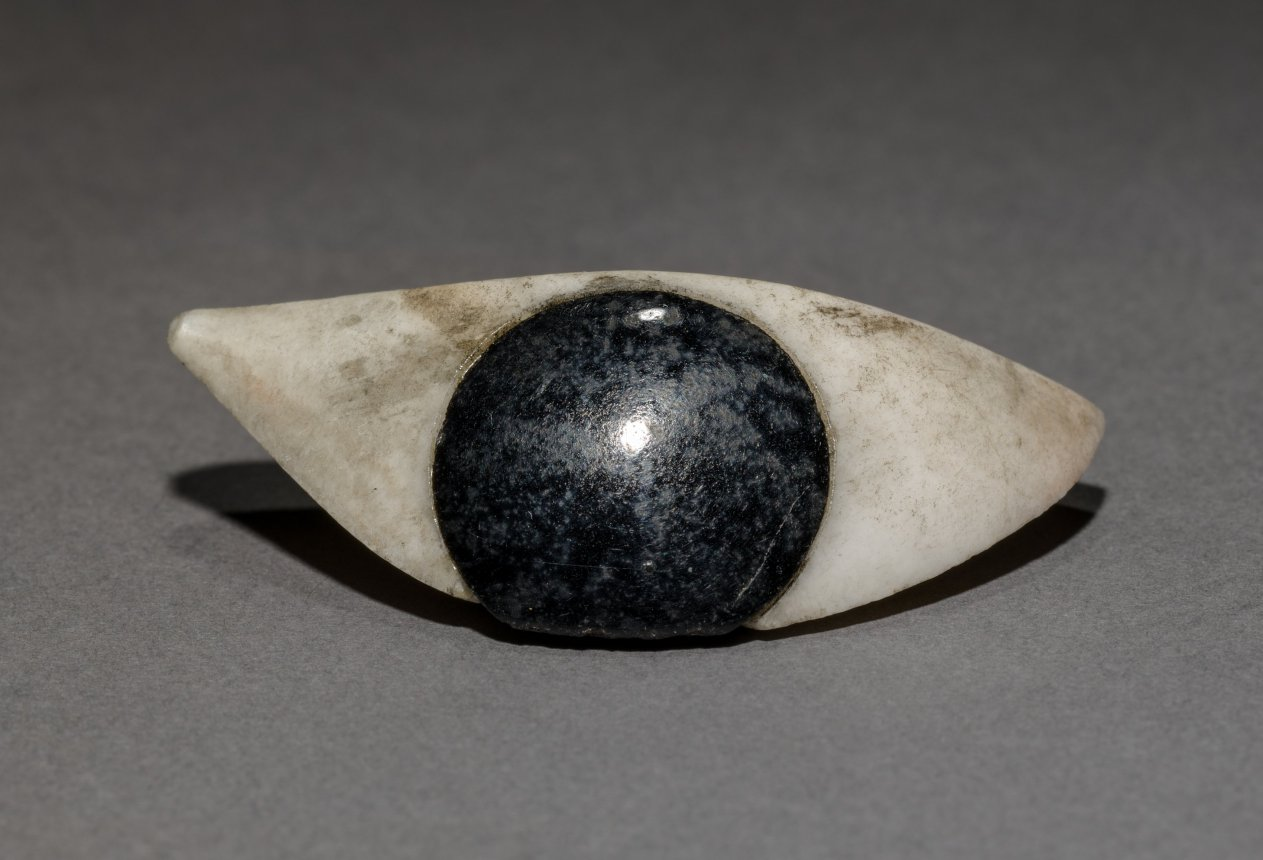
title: Inlay Eye (one of a pair)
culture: Egypt, Haraga, cemetery E, tomb 614, excavated in 1914, Middle Kingdom (2040–1648 BCE), Dynasty 12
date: 1980–1801 BCE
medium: travertine and obsidian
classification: Funerary Equipment